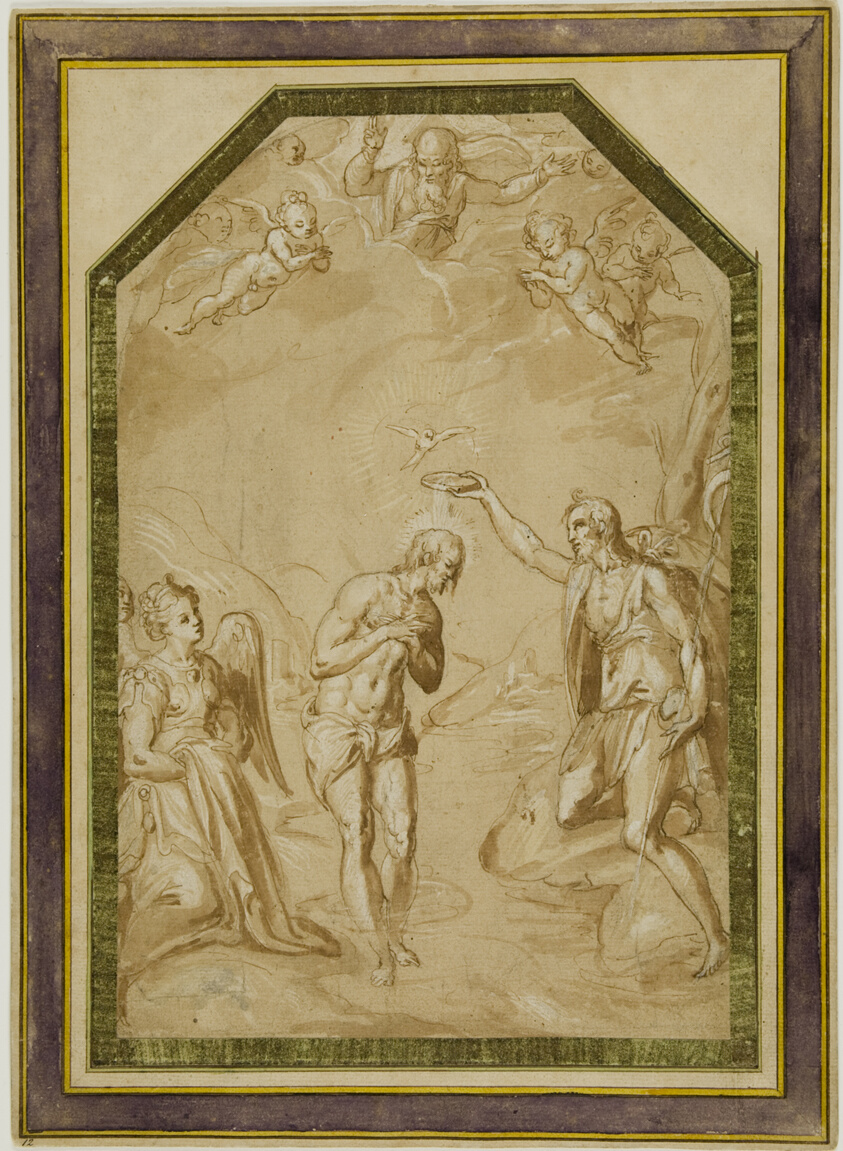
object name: Drawing and Watercolor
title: Baptism of Christ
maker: Italian, Bolognese; Mid-16th century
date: c. 1560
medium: Pen and brown ink with brush and brown wash, heightened with lead white, partially oxidized, over black chalk, on tan laid paper, laid down on cream laid card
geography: Italy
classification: pen and ink drawings; drawings (visual works); prints and drawing; brush and wash